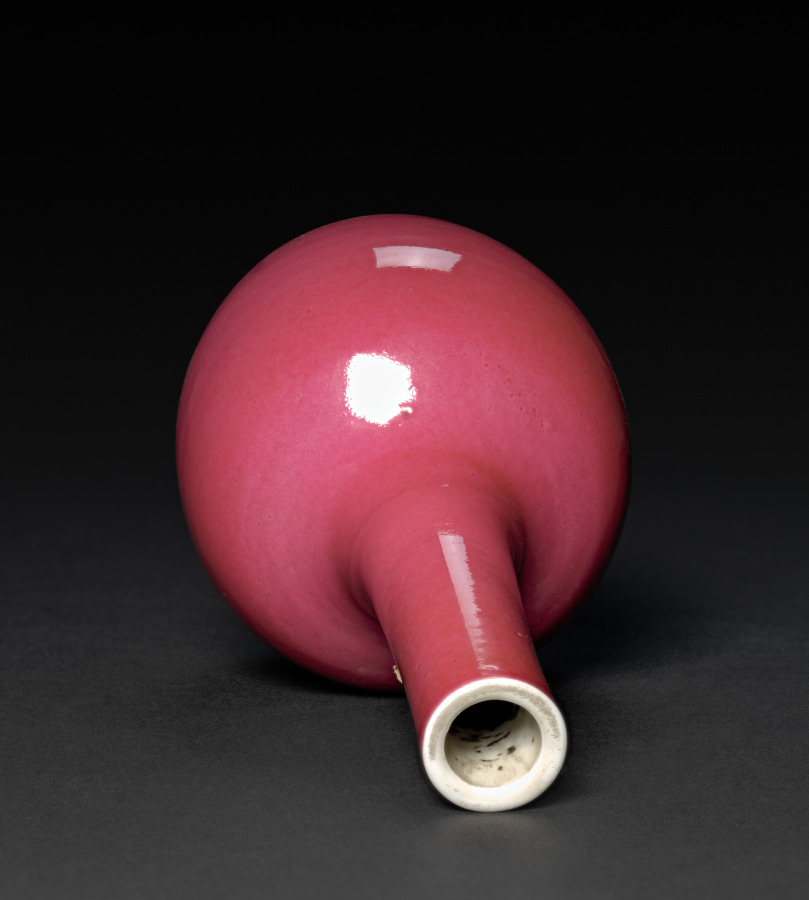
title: Vase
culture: China, Qing dynasty (1644-1911)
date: 1800s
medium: porcelain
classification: Ceramic